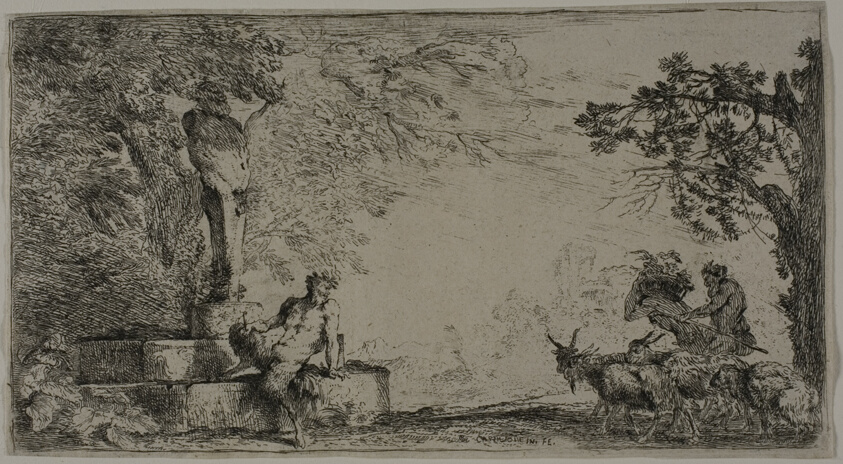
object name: Print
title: Satyr Resting beneath a Herm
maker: Giovanni Benedetto Castiglione (Italian, 1609-1664)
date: 1645–47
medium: Etching on paper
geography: Italy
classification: etching; print; prints and drawing